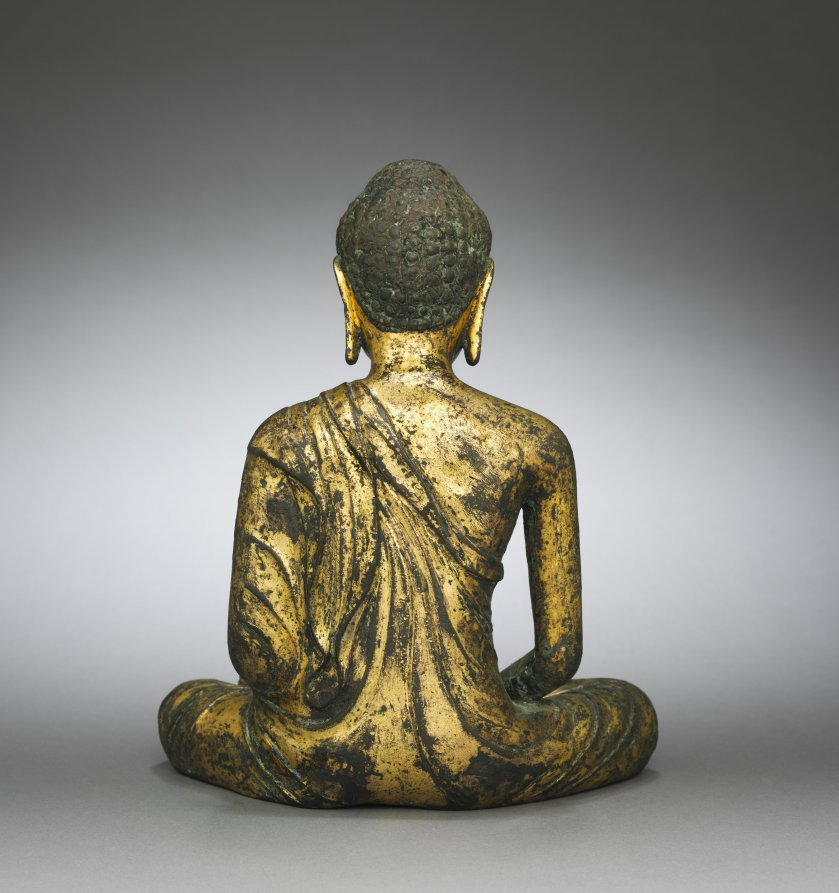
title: Amitabha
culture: China, Yunnan province, Dali kingdom (938–1253)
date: mid-1000s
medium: gilt bronze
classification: Sculpture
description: This delicately crafted statue of Amitabha, the Buddha of Infinite Light, bears testimony to the flowering of Buddhist art under the Liao Empire established by the Khitans, a nomadic Mongolian people, after the Tang persecution of Buddhists in 845. The Liao rulers were devout Buddhists who commissioned substantial religious projects. Liao Buddhist artifacts reflecting close ties to the Tang traditions were likely executed by displaced or enslaved artisans as a result of the Khitan conquest of northern China.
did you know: This gilt bronze Buddha is similar in style to another rare piece in the Shanghai Museum, which bears an inscription dating it to 1043, the second year of the Shengming reign of the Dali kingdom.